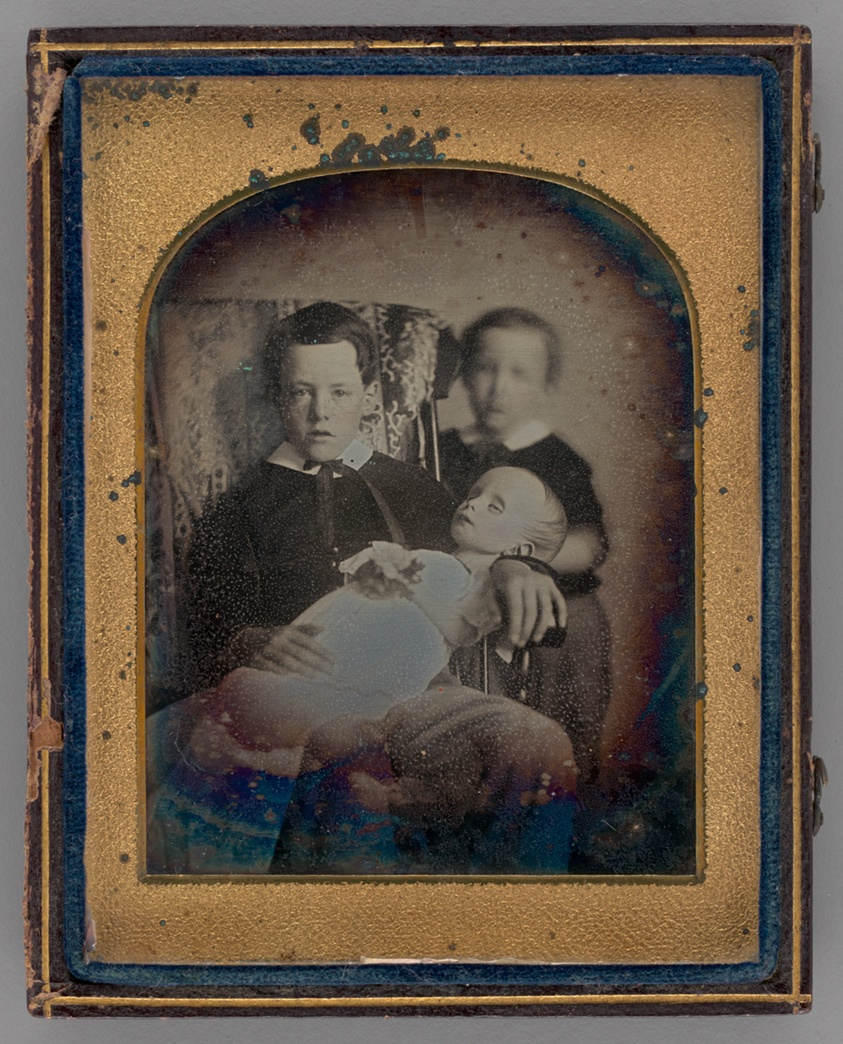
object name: Photograph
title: Untitled (Two Boys Holding a Deceased Baby)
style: 19th century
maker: Unknown maker; American, 19th century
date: 1850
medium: Daguerreotype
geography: United States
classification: portrait; daguerreotype; portrait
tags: lundberg collection, children, post mortem portrait, portraits: multiple subjects, portraits: child subject, portraits, portrait, photography, babies